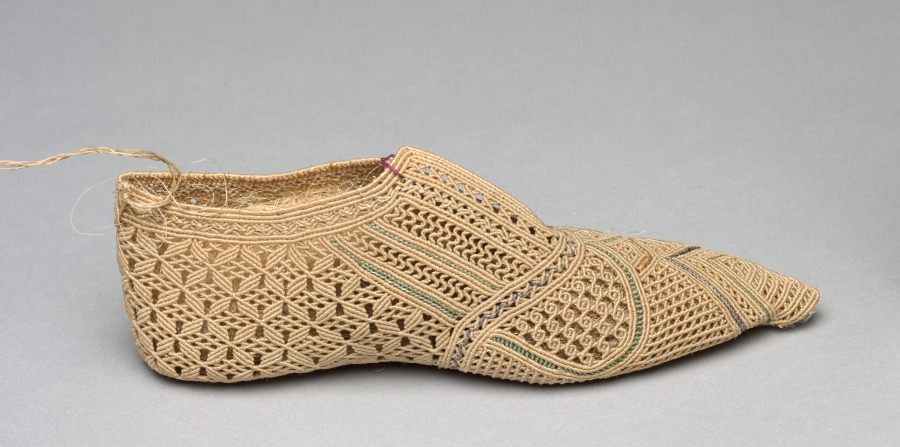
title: Shoe (one of a pair)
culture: Philippines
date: 1850s-1920s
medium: Abacá fiber: macramé knotted lace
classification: Garment